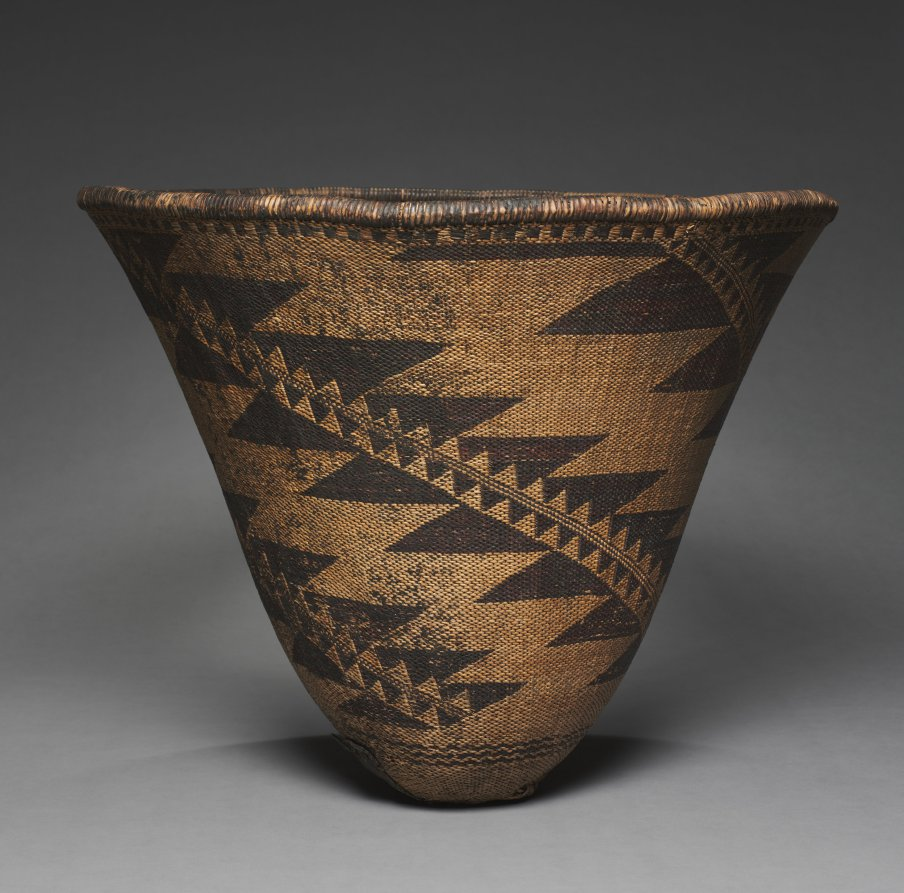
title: Burden Basket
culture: California, Pomo, central, late 19th century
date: 1880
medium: redbud, sedge; diagonal twine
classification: Basketry